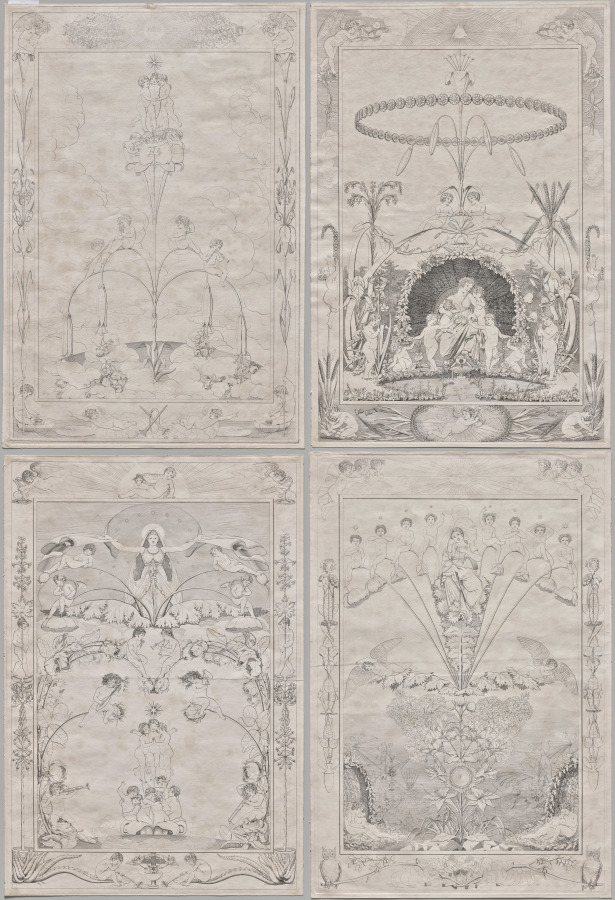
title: Times of Day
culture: Germany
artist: Philipp Otto Runge (German, 1777–1810)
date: 1803–05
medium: Set of four etchings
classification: Print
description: Phillip Otto Runge’s large-scale, four-part print series, Tageszeiten (Times of Day), is a landmark of German Romantic printmaking, capturing the “new art” promoted by Runge and his contemporary, Caspar David Friedrich, one rooted in a more personal and spiritual response to nature. Runge presents allegories of nature as a means to understand God and the sublime on earth. His four-part series represents not only the four times of day but also the seasons and the stages of human life, while contrasting eternal time with human time through various literary and religious references. Viewing the series from Morning to Night, seedlings emerge from the earth, bloom, decay, and die. Young spirits or children are born, mature, and grow old, eventually entering a sleep reminiscent of death. A female figure appearing in two scenes, possibly Mother Nature, inspires abundance and then embraces its decline, suggesting nature’s continuity despite human mortality. In each plate, Runge contrasts eternal time with human time, or spirituality with physicality, by contrasting the iconography in the borders with that in the centers.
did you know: After receiving a set of Times of Day as a gift from the artist, the German author Johann Wolfgang von Goethe (1749–1832) apparently exclaimed, “it’s enough to drive you crazy—beautiful, and mad at the same time!”